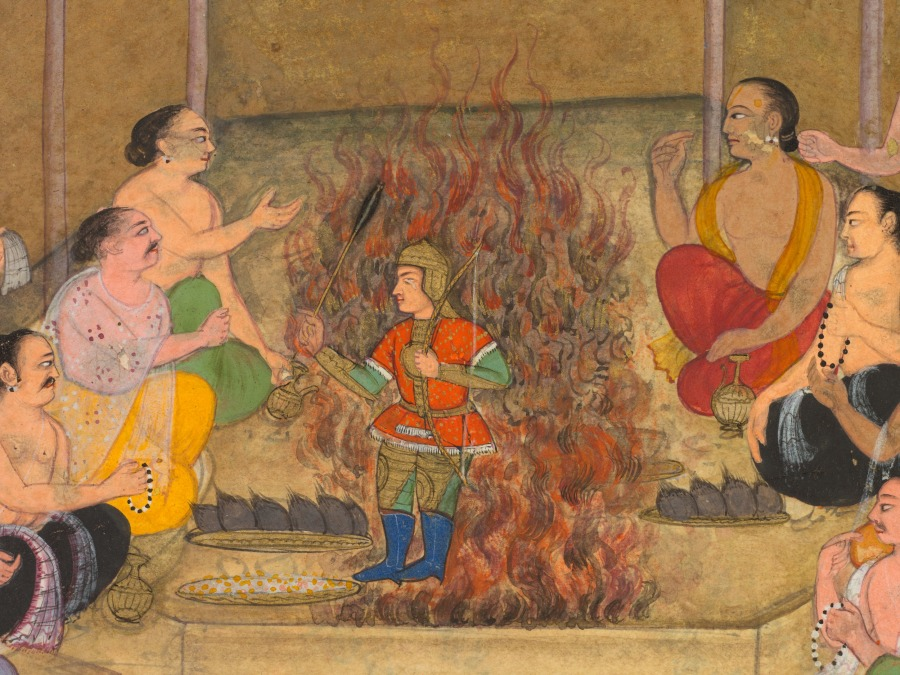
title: Yaja and Upayaja perform a sacrifice for the emergence of Dhrishtadyumna from the fire, from Adi-parva (volume one) of the Razm-nama (Book of Wars) adapted and translated into Persian by Mir Ghiyath al-Din Ali Qazvini, known as Naqib Khan (Persian, d. 1614) from the Sanskrit Mahabharata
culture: Mughal India; made for Abd al-Rahim the Khan Khanan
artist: attributed to Bilal Habshi (probably Ethiopian, active late 1500s)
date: 1598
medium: Gum tempera, ink, and gold on paper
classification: Painting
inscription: Inscriptions around painting: Ascribed to Bilal Habashi (probably Ethiopian, active late 1500s) Mughal court, made for Abd al-Rahim the Khan Khanan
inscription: Persian inscription in bottom margin, in nasta‘liq script: The performing of a sacrifice by King Drupada with Yaja and Upayaja and the appearing of Dhrishtadyumna and Draupadi from the fire; Bilal-i Habashi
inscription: Persian inscription at edge of bottom margin, in nasta‘liq script: and sword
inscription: Calligraphy: Persian text in naskh script: “. . . and rules in Panchala. I want you to take him and bring him to me.” They went to war with Drupada and fought a battle, and King Drupada managed to overcome the Kauravas and put them to flight, but the Pandavas fought him and brought him to Master Drona. Droṇa took half of his [Drupada’s] kingdom from him and left him the other half. King Drupada was extremely distressed that Master Drona had overcome him and wished he could have an offspring who would kill Master Drona. With this desire in his mind, he went to the shores of the Ganges River so that perchance he could find a person whose prayers on his behalf to the almighty God to graciously bestow upon him an offspring capable of killing Droṇa would be accepted. By the banks of the Ganges he saw two pious worshipers. One was called Yaja and the other Upayaja. He spent some time there performing services for them and bringing them whatever they required. After a long while, one day he said to Upayaja: “I would like you to do what is needed so that I have a son who could kill Master Drona. If you do this I will give you one lakh [a hundred thousand] of cows and whatever else you demand.” Upayaja did not accept this. Once again Drupada spent time at their service, and then once again he begged Upayaja to do this. He said: “Go to my elder brother Yaja, since he still has a little attachment to this world, so that he can perform the sacrifice for you, so that the almighty God would bestow on you the offspring that you desire.” King Drupada went therefore to Yaja the brahmin and told him what Upayaja had told him and said: “If you perform the sacrifice for me so that I have son who would kill Master Drona, I would give you eighty thousand cows.” Yaja said, “What kind of a person is Master Drona that you do not deem yourself a match for him?” Drupada said, “Droṇa is the kind of person who remains without rival and peer in the arts of war. His bow is six times the length of the elbow to the fingertip, and nothing in the world can rival and overcome him.” Yaja said: “I will perform the sacrifice for you, so long as my brother Upayaja joins forces with me.” So King Drupada and Yaja both went to Upayaja and pleaded so long that he at last agreed to be present at the sacrifice. They thus made a wish for King Drupada to have a son to kill Droṇa and made a big sacrifice, and from the midst of the sacrificial fire suddenly a son emerged clad in a coat of mail holding a bow in one hand.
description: Fire sacrifice was central to the Indo-European people who entered the Indian subcontinent as early as 1800 BC. Only Brahmins, a social class of priests, had access to the sacred texts called the Vedas, which explained the meaning and process of the fire sacrifice, considered by orthodox Hindus as a way to communicate with the gods. A king named Drupada in ancient India sponsored this fire sacrifice in order to generate a powerful warrior who would be able to slay the enemy who took half his kingdom. Seated around an altar in the sacrificial enclosure, Brahmins pour oblations into the fire and recite the prayers necessary to generate the divine warrior Dhrishtadyumna, shown here in full battle armor at birth. The inscription below gives the title and the name of the artist, Habshi, which means “Ethiopian,” suggesting the presence of Africans in the royal Mughal workshop. The story of how the warrior Dhrishtadyumna was generated from the fire sacrifice is written on this page. When King Drupada lost half his kingdom to a military master named Drona, he needed a gift from the gods to defeat him: a new warrior born to accomplish this mission. In order to obtain this gift, King Drupada went to the banks of the Ganges to find two powerful Brahmins to whom the gods would respond favorably. After serving them faithfully and offering payment of 100,000 cows, the Brahmins Yaja and Upayaja agreed to perform the sacrifice. The text is written in a form of Arabic script, called naskh, in the Persian language, as translated from the original Sanskrit epic Mahabharata for emperor Akbar (r. 1556¬–1605). The passages of dialogue are written diagonally.